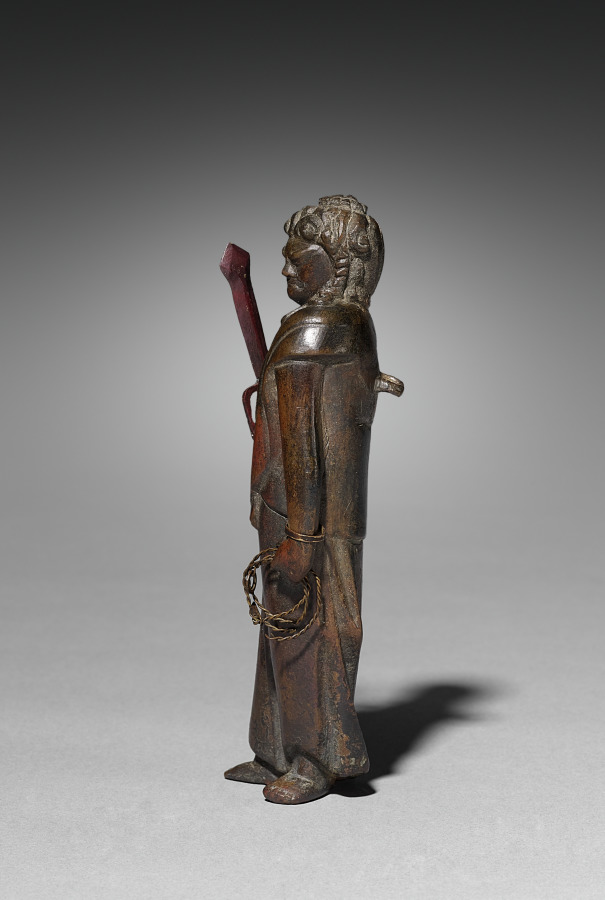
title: Fudō Myōō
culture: Japan, Kamakura period (1185–1333)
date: early 1300s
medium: bronze with wire attachments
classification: Sculpture